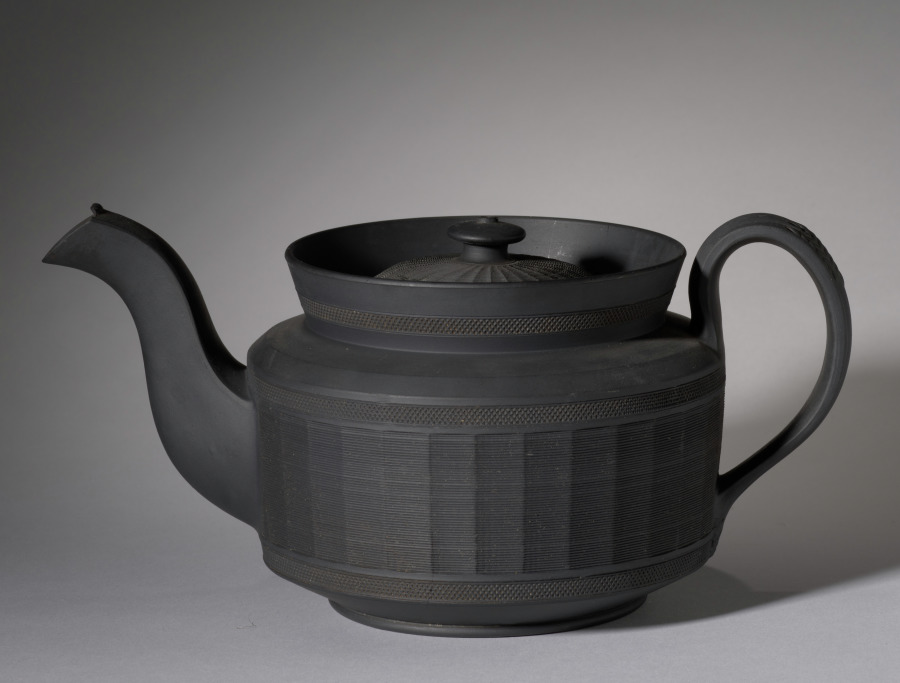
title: Teapot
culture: England, Staffordshire, 19th century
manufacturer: Davenport Pottery and Porcelain Factory (British)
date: 1800s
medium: black basalt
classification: Ceramic